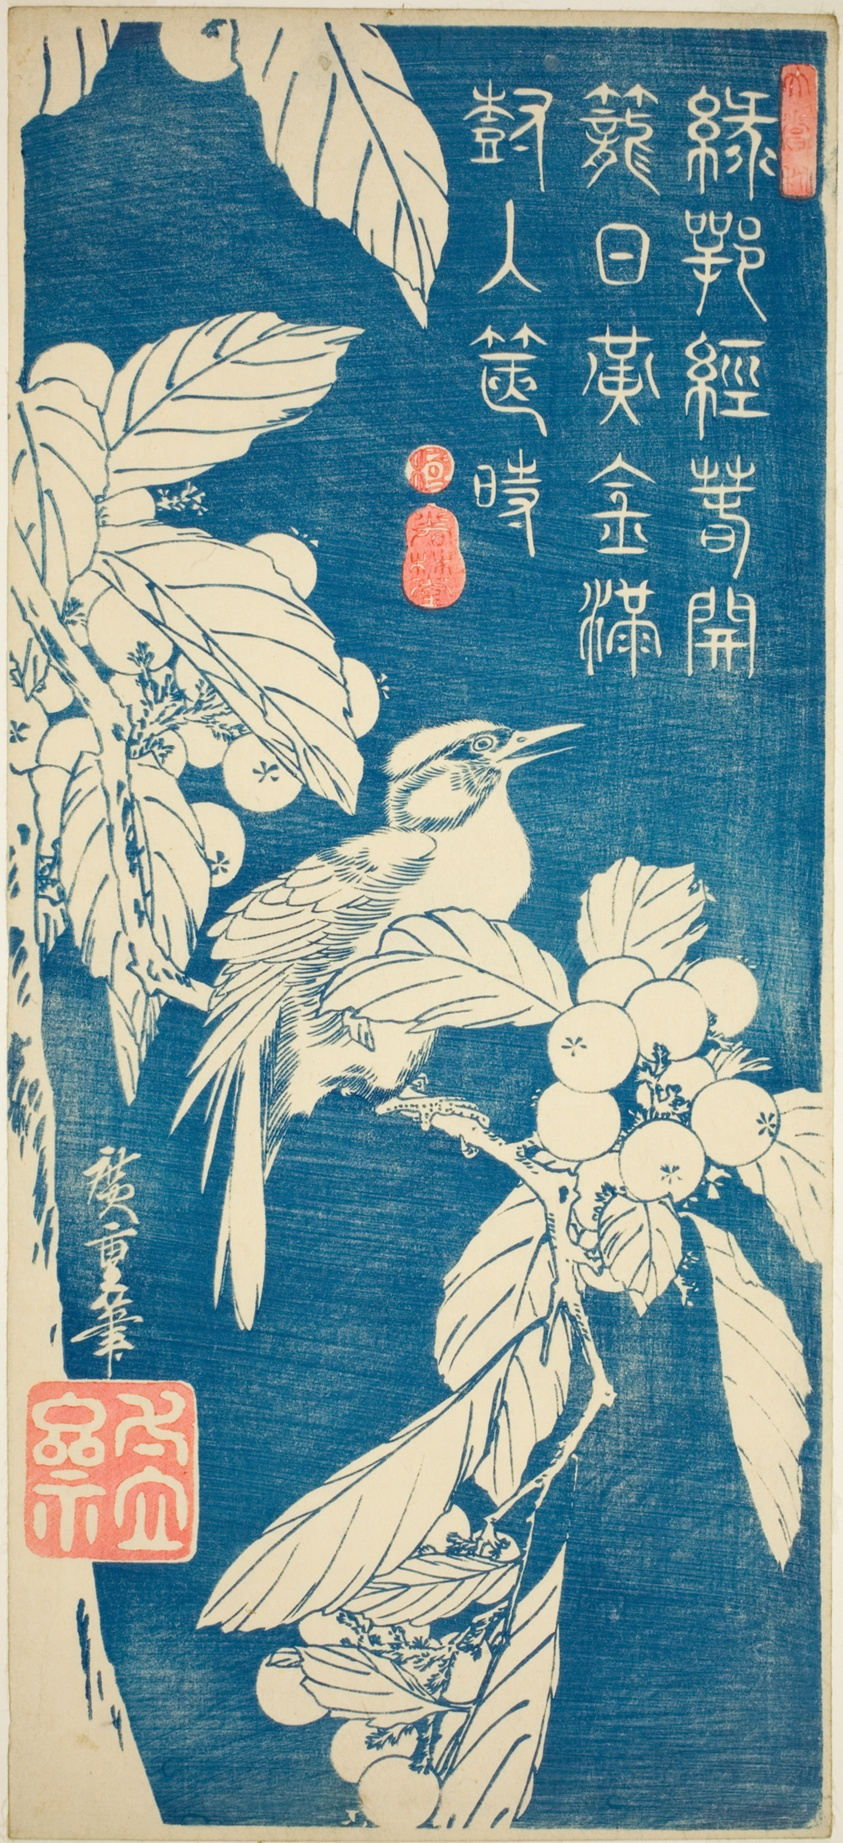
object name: Print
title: Loquat and bird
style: Japanese (culture or style)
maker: Utagawa Hiroshige 歌川 広重; Japanese, 1797-1858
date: early 1830s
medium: Color woodblock print; otanzaku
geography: Japan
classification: woodblock print; print; asian art